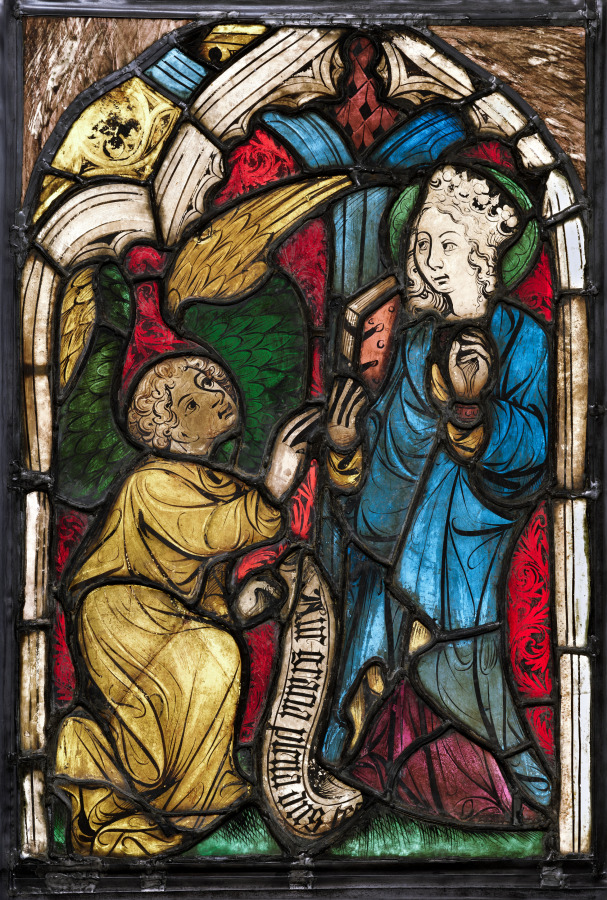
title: The Annunciation from the Parish Church of Maria am Waasen in Leoben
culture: Austria, Styria, 15th century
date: c. 1410–20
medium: stained glass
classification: Glass